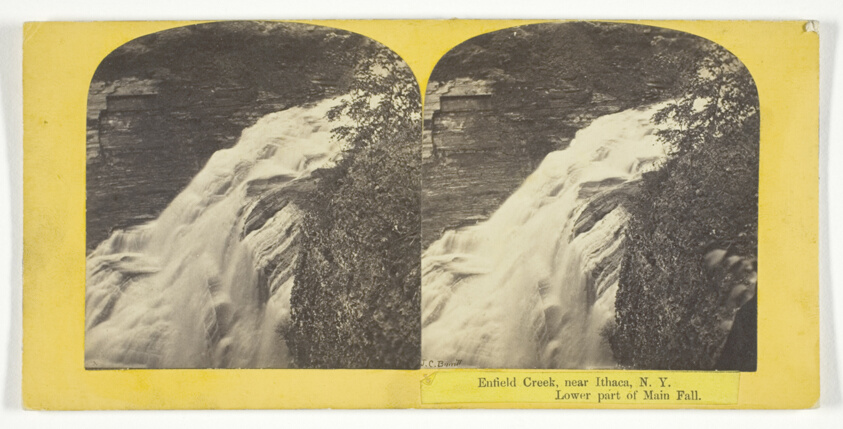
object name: Photograph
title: Enfield Creek, near Ithaca, N.Y. Lower part of Main Fall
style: 19th century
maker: J. C. Burritt; American, active 1860s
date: 1860/65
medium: Albumen print, stereo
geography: Ithaca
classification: photography; photograph; albumen silver print; stereograph (albumen)